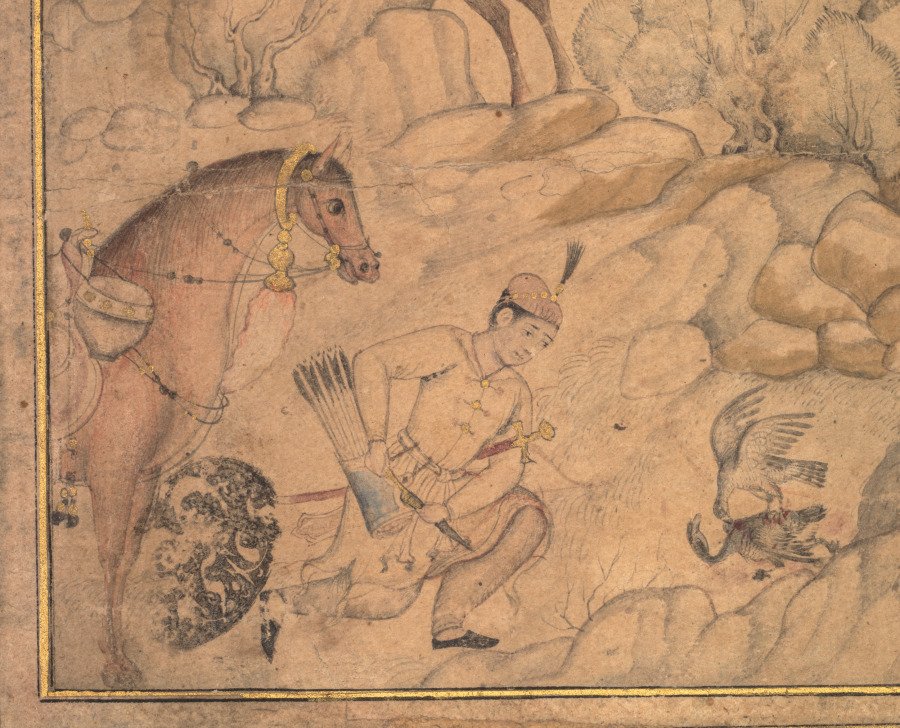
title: Princes hunting in a rocky landscape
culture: India, Mughal, 16th century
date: c. 1580–85; borders added c. 1700s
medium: Ink, slight color, and gold on paper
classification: Painting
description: The subdued palette of this tinted drawing belies the dire events of the scene. A group of Mughal nobles out hunting with falcons has chanced upon two lions in the wilderness, and one of the men has been attacked. The bearded figure with the falcon at the upper left and the huntsman about to retrieve a duck caught by one of the trained falcons at the lower left are reminiscent of an earlier work, Hunting with Falcons in a Landscape (CMA 2013.292), painted by a Persian artist. By the time this painting was made Akbar exerted more direct influence on his artists’ work, and it reveals his taste for dramatic action and climactic moments where life and death hang in the balance.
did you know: A hunter with gunpowder pouch hurriedly loads a musket with a scouring stick.